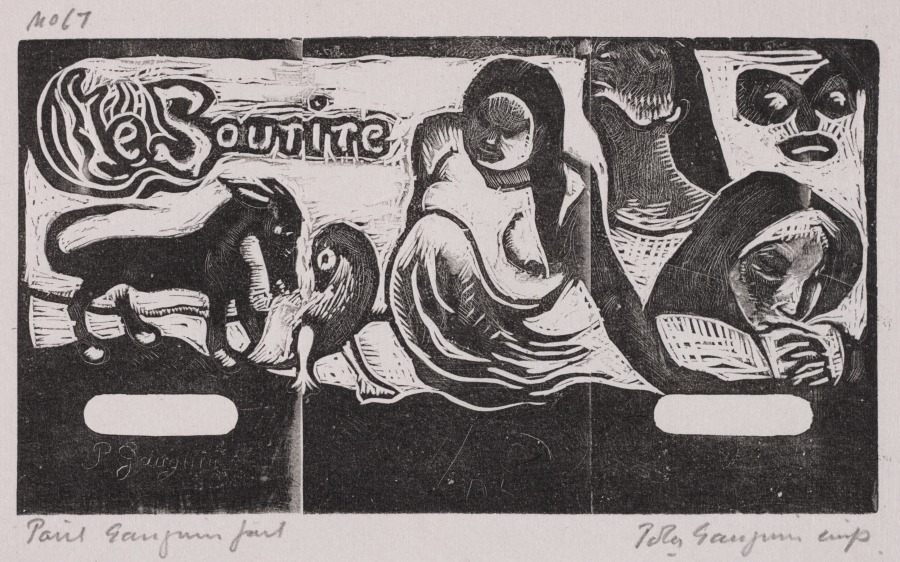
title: Tahitian and Noa Noa Series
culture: France, 19th century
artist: Paul Gauguin (French, 1848–1903)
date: 1893–94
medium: woodcut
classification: Print